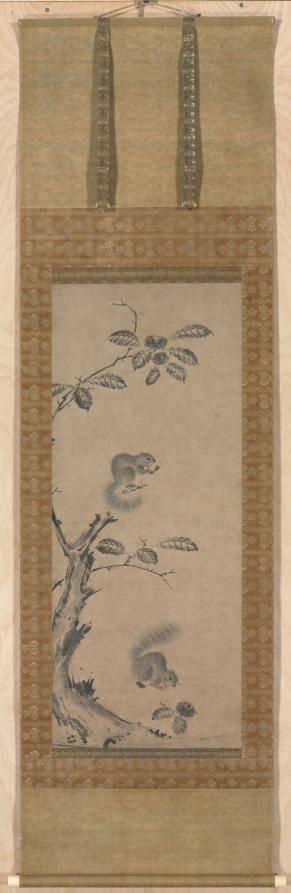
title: Squirrels on the Chestnut Tree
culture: China, Yuan dynasty (1271-1368)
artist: Ge Shuying (Chinese, active 1300s)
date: 1300s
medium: Hanging scroll; ink on paper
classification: Painting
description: One squirrel perches on a branch nibbling a chestnut, while the other on ground is approaching a fallen chestnut. The painter used fine, short staccato strokes to simulate the animal’s soft fur, while the tree is depicted with broader wet strokes in a rougher manner. Ge Shuying is known for his depictions of squirrels in a monochrome style characterized by crisp, decisive brushstrokes. He may have been a Chan (Zen) priest-painter, or perhaps a Daoist painter, active in the Hangzhou region of eastern China. From there his works spread to Japan, where squirrel paintings gained the attention of Japanese collectors.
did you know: Dr. Ju-hsi Chou argues that Yongtian and Songtian were different, but related (father-son, master-pupil, or brothers) painters of squirrels. Ge was apparently their family name. A Tokyo National Museum squirrel painting signed Songtian Shanren (松田山人) has a seal giving the artist's formal name as Ge Shuying (葛淑英).